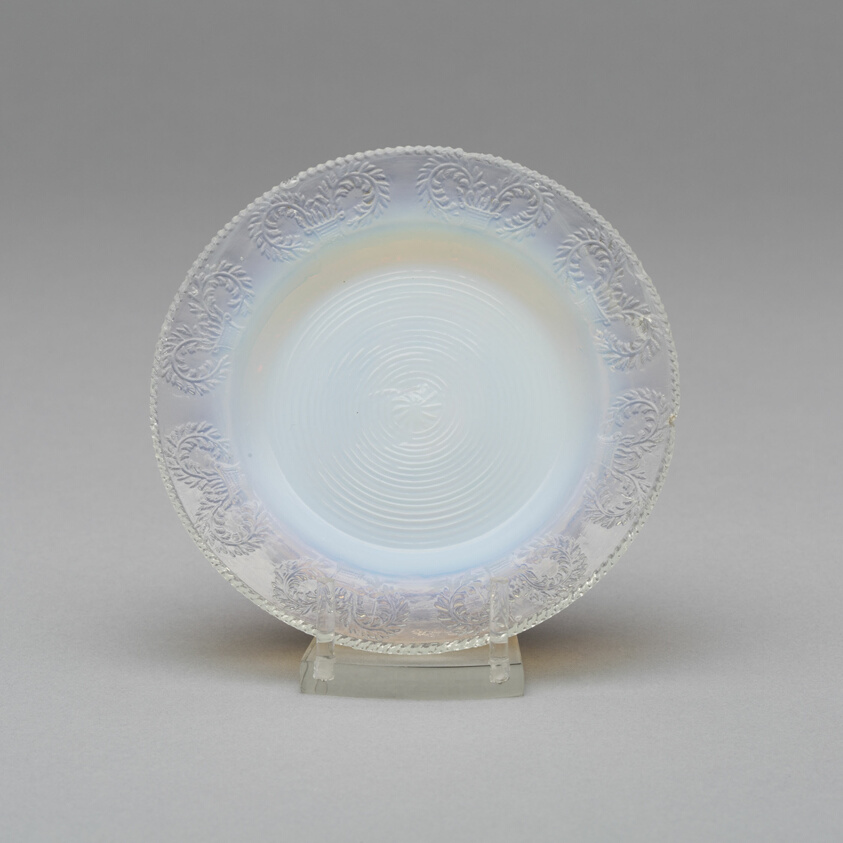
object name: Glass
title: Cup plate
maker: Artist unknown (American, 19th century); New England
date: 1826–30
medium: Pressed glass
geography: New England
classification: plate (general, dish); glass; american decorative arts; american arts; decorative arts